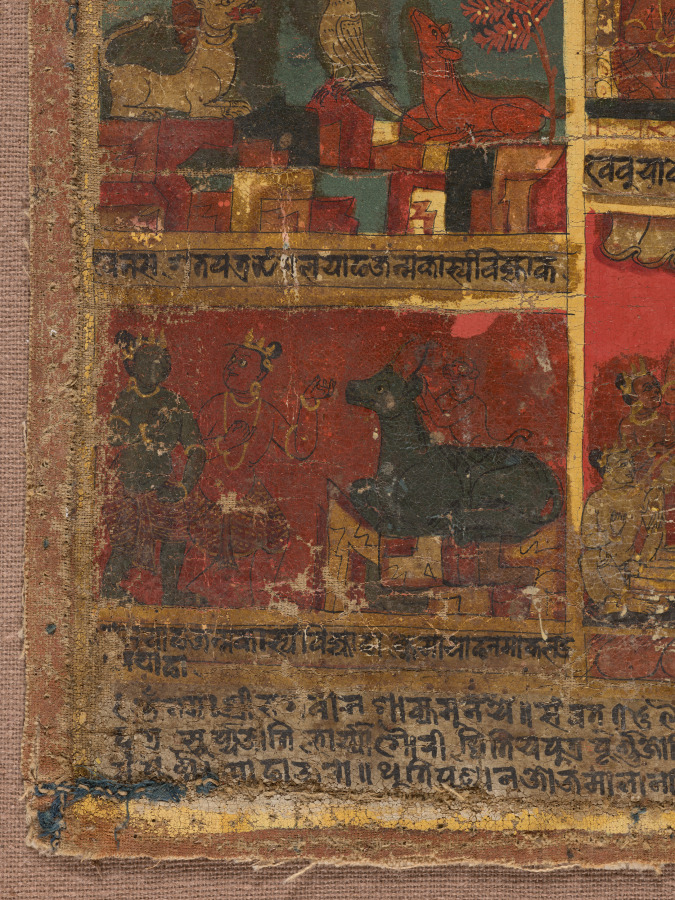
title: Bejeweled Buddha Preaching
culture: Nepal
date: 1648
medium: Gum tempera, ink, and gold on cloth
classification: Painting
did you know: Nepalese devotional paintings on cloth are called "paubha" in the Newari language.